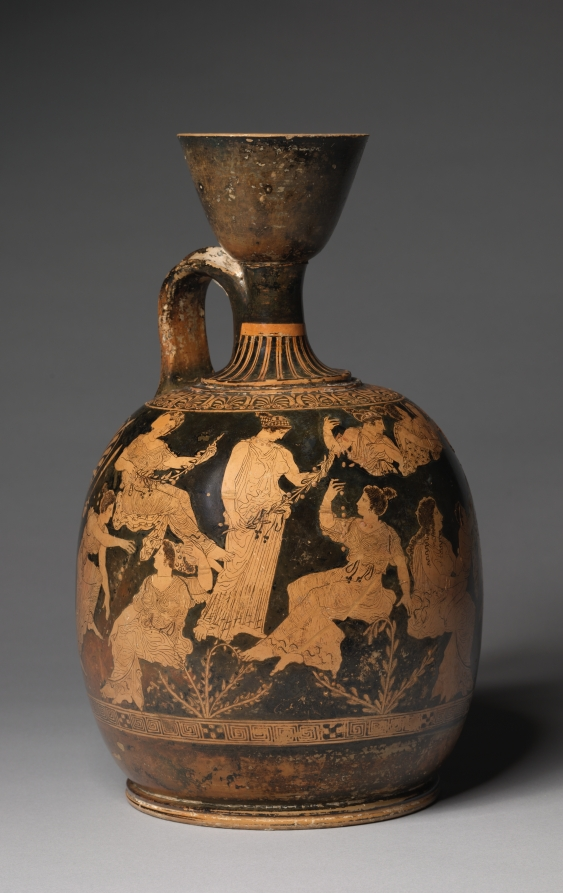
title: Red-Figure Squat Lekythos (Oil Vessel): Birth of Erichthonios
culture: Greek, Attic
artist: attributed to Meidias Painter (Greek, Attic, active c. 420–400 BCE)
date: c. 420–410 BCE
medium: ceramic, with gilding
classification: Ceramic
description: The central group on this vase shows the seated earth goddess Ge (also known as Gaia) handing her baby, Erichthonios, to Athena. Conceived from the seed of Hephaistos, Erichthonios would go on to become a king of Athens, and the story of his birth became popular in Athenian art of the fifth century BC. Other representations include Hephaistos as well as Kekrops, the mythical first king of Athens, sometimes together with Zeus and other deities. But this one includes only female onlookers—likely the three daughters of Kekrops watching from above, with Aphrodite and several abstract personifications such as Peitho (Persuasion) and Eudaimonia (Happiness) standing and seated nearby.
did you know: A lead rivet sits at the junction of handle and neck, probably an ancient repair.